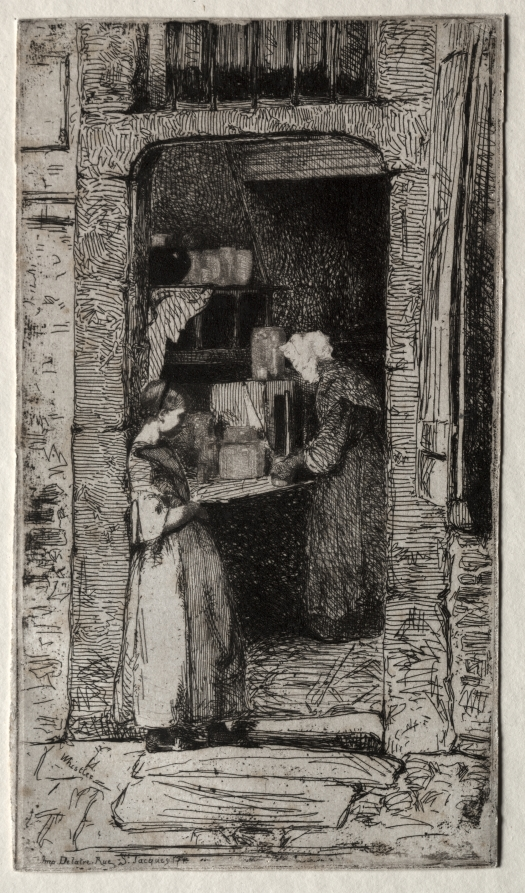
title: La Marchande de Moutarde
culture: America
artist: James McNeill Whistler (American, 1834–1903)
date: 1858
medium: etching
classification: Print